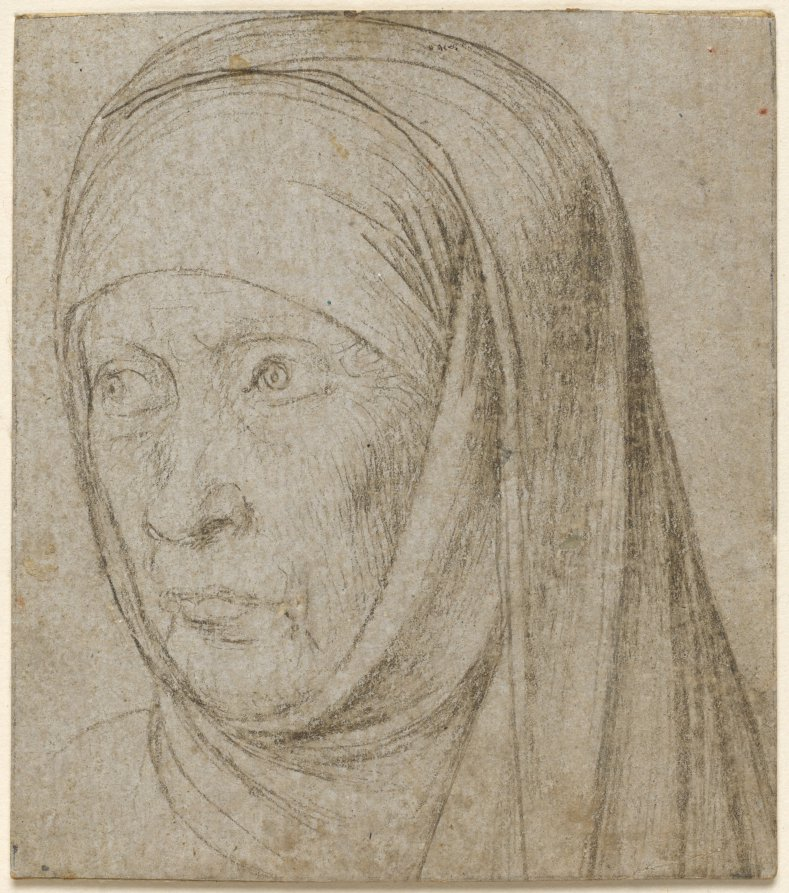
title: Head of an Old Woman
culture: Germany, late 15th-early 16th Century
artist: Hans Holbein (German, c. 1465–1524)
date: c. 1500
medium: silverpoint; traces of framing lines in graphite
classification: Drawing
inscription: VERSO OF SECONDARY SUPPORT, upper right, in graphite: L#. [2..h?] ; center, in black chalk: SAS [in ligature, collectors mark, see provenance] ; center right, in graphite: eÿck 30 ; VERSO OF FRAGMENT OF OLD MOUNT (now removed), at left, in graphite: W. Hollar ; upper left, in graphite: B ; center, in graphite: [illegible]